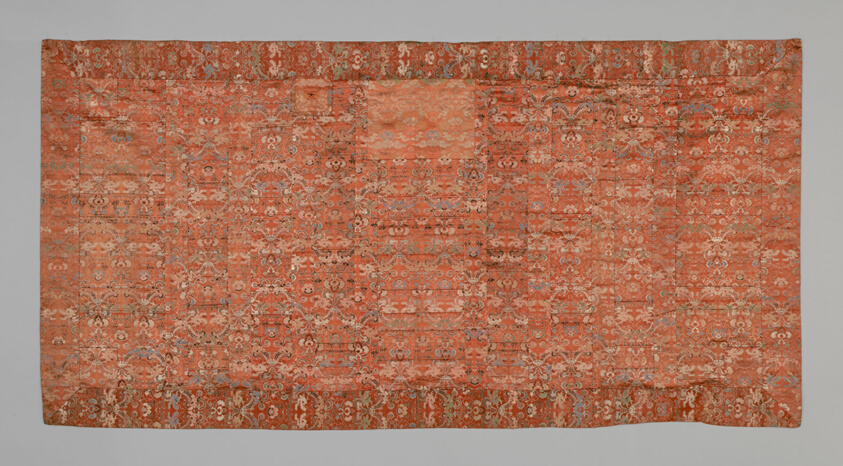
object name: Textile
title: Kesa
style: edo (japanese period)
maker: Japan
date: Edo period (1615–1868), 1750/75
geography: Japan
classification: textile; costume; liturgical - buddhist; weaving